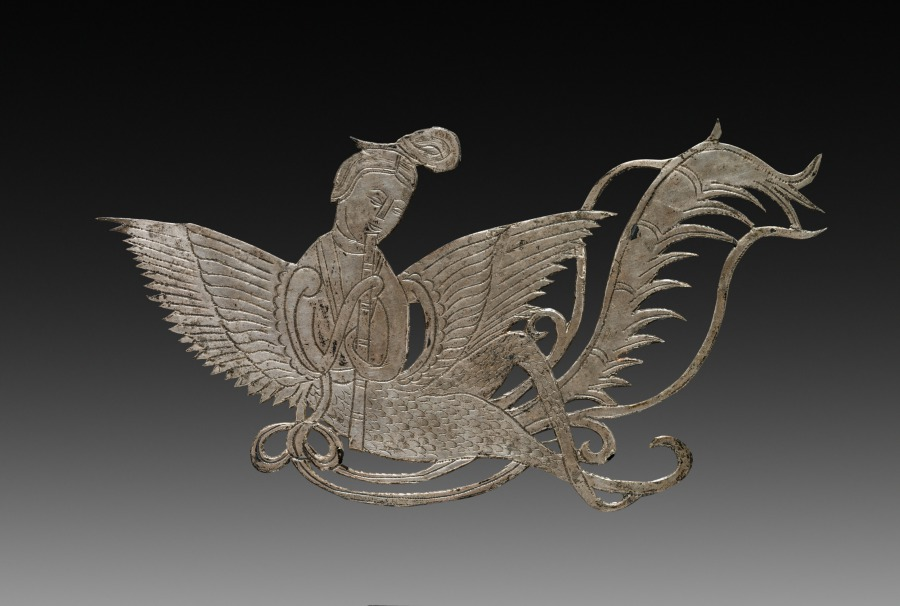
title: Inlay for a Mirror or Box: Lady and Flute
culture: China, Tang dynasty (618-907) - Song dynasty (960-1279)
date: c. 900–1000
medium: beaten silver with chased details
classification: Metalwork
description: The p'ing-t'o technique of inlaying gold and silver foil on lacquer produced luxurious articles of elegance and fragility. These stray silver inlays were originally mounted on a mirror back or a cosmetic box whose lacquered surface has disintegrated. They combine auspicious symbols of Indian and Chinese origin--human-headed birds whose melodies filled the Buddhist paradise, and bird-riding deities who inhabited the skies of Taoist mythology. Like these imaginary beings, the lions were probably paired in a radial design; at least one has been lost.